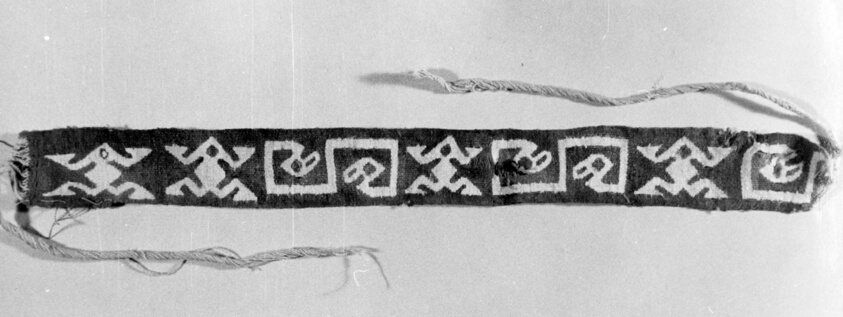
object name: Textile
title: Headband or Belt Fragment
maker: Possibly central coast, Peru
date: A.D. 1000/1476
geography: Peru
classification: textile; weaving; costume; dress (garment); clothing